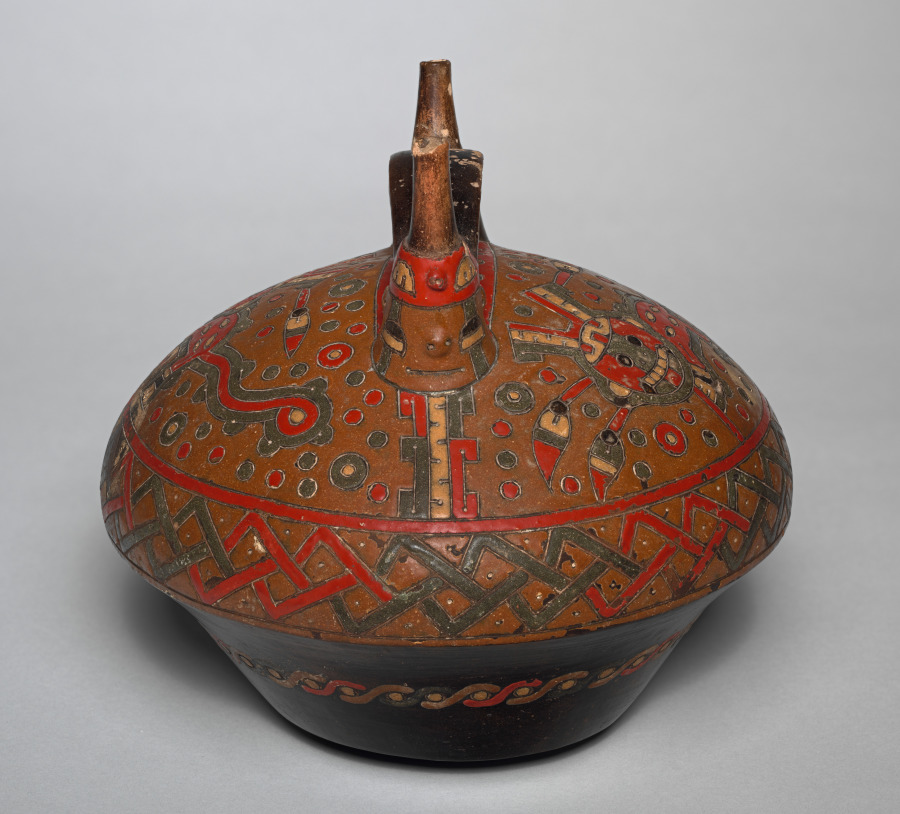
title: Double-spouted Vessel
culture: Andes, south coast, Paracas people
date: 750–1 BCE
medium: Ceramic, resin-based paint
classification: Ceramic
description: The Paracas style, the earliest of Peru’s south coast, focuses on geometric abstraction and polychromy, the latter achieved in ceramics with resin-based paints applied after the vessel was fired. This example is embellished with two monkey- or feline-like creatures whose curvilinearity indicates the vessel was made in the late stages of the Paracas sequence.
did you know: A face with upturned eyes on one spout gives this vessel a specific orientation.